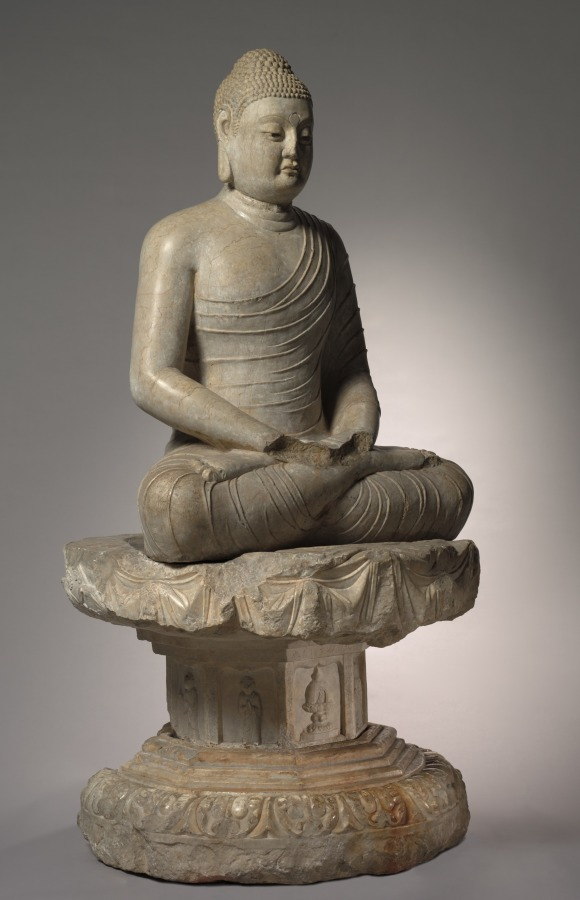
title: Seated Amitayus Buddha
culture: China, Northern Qi dynasty (550-577)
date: c. 570s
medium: marble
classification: Sculpture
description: Amitayus, the Buddha of Infinite Life, is seated in meditation on a double lotus pedestal. The pedestal was not made with the statue but the combination is faithful to the original artistic conception. The statue is an extremely rare example of a major type of Northern Qi Buddhist sculpture. The heavy, massive front highlights the sense of monumentality and the spiritual essence of the Buddha. Today the sculpture is united with a pedestal that exhibits the rich, ornate style of early Tang sculpture. It was commissioned by the Duke of Liang, Fang Xuanling (578–648), for the blessing of his second son and daughter-in-law, the Tang imperial princess of Gaoyang. The iconography and inscription suggest that it originally went with a statue, now missing, of Shakyamuni, the historical Buddha, instead of Amitayus.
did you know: The stringlike folds of the Buddha's draperies emphasize his monumental, rigidly erect torso and tubular limbs.